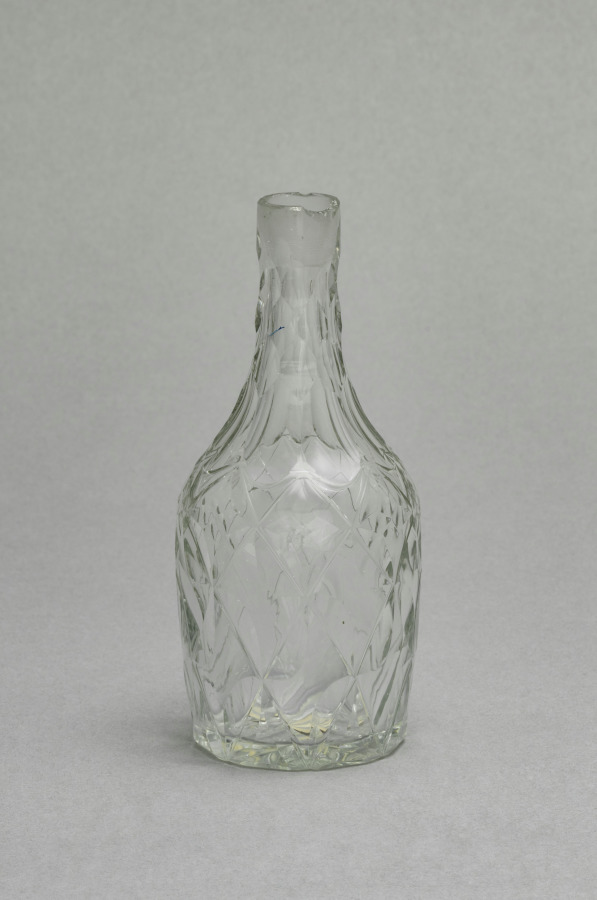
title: Cruet Stand (Bottle)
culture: France, bottle and cover old, but probably not original, 18th Century(?)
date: 1700s(?)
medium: silver and glass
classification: Metalwork